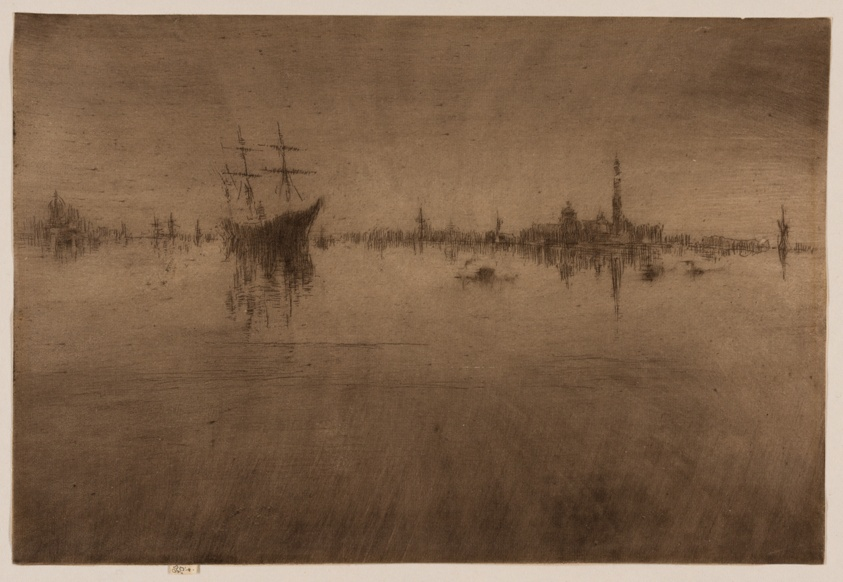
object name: Print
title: Nocturne, from Venice, a Series of Twelve Etchings (the "First Venice Set")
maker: James McNeill Whistler (American, 1834-1903)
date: 1879–80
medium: Etching and drypoint in brown on cream laid paper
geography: United States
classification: etching; print; prints and drawing; paper; drypoint